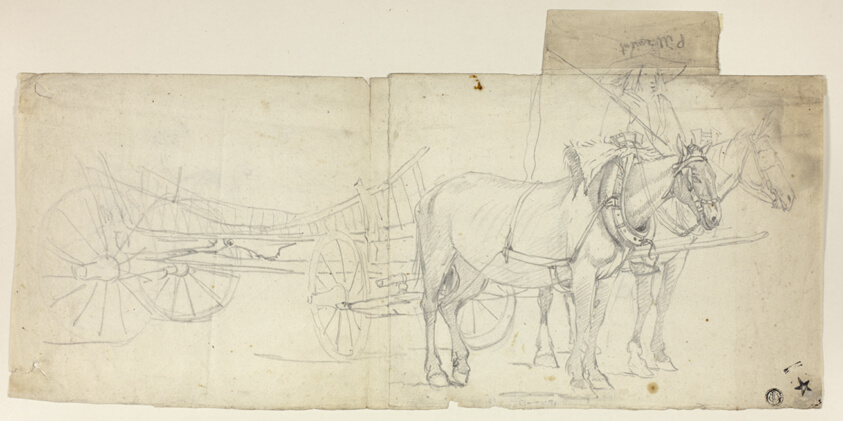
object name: Drawing and Watercolor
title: Two Horse Team with Driver, Pulling Carriage (recto); Sketches of Women Bending Over (verso)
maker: Attributed to David Teniers the Younger; Flemish, 1610-1690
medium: Graphite on ivory laid paper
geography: Belgium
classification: graphite; drawings (visual works); prints and drawing